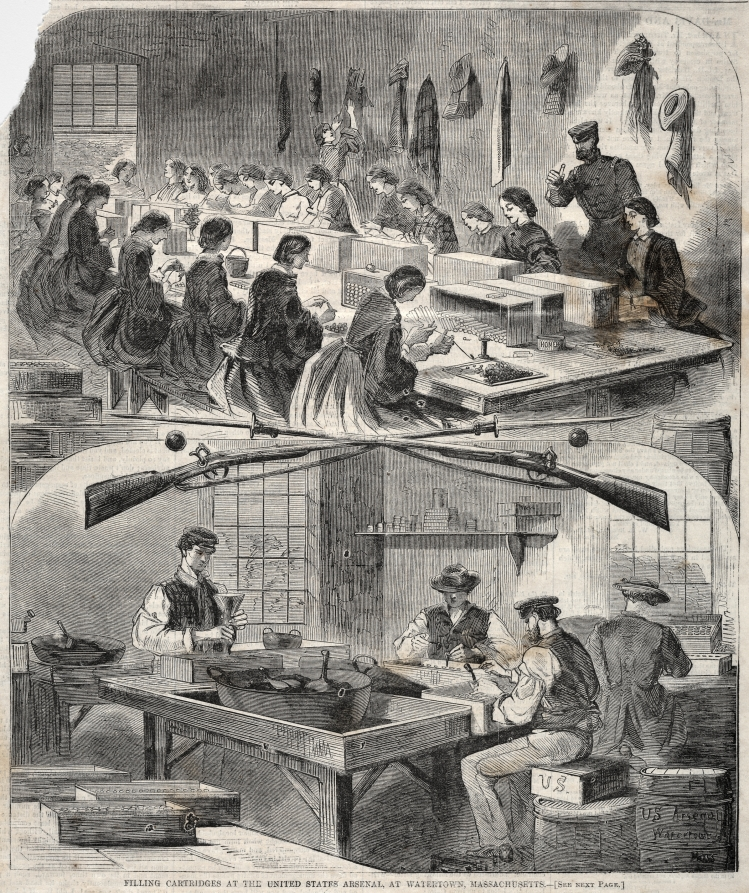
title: Filling Cartridges at the United States Arsenal, at Watertown, Massachusetts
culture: America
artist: Winslow Homer (American, 1836–1910)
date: 1861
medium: wood engraving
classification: Print